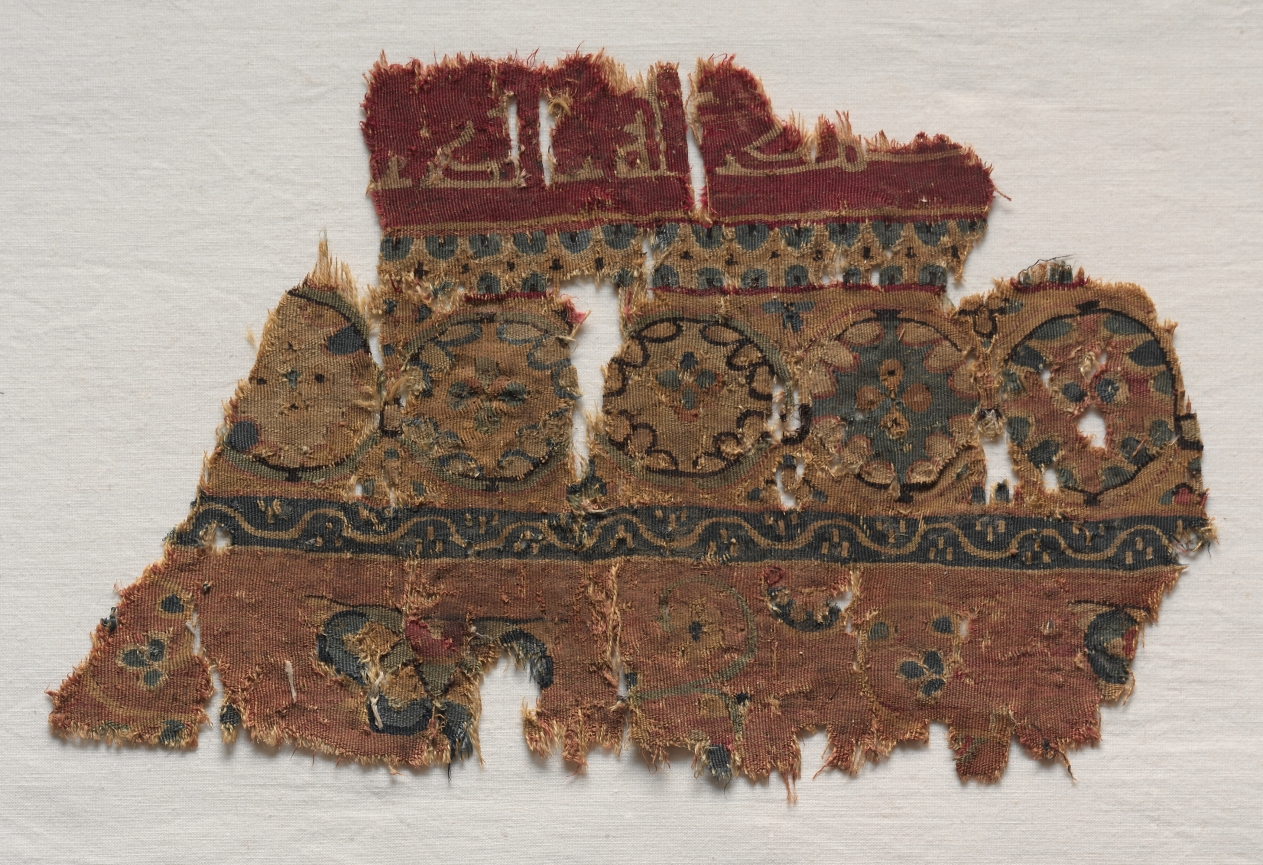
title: Fragment of a Band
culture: Egypt, Umayyad period (661–750)?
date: 600s - 700s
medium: tapestry weave: wool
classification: Textile